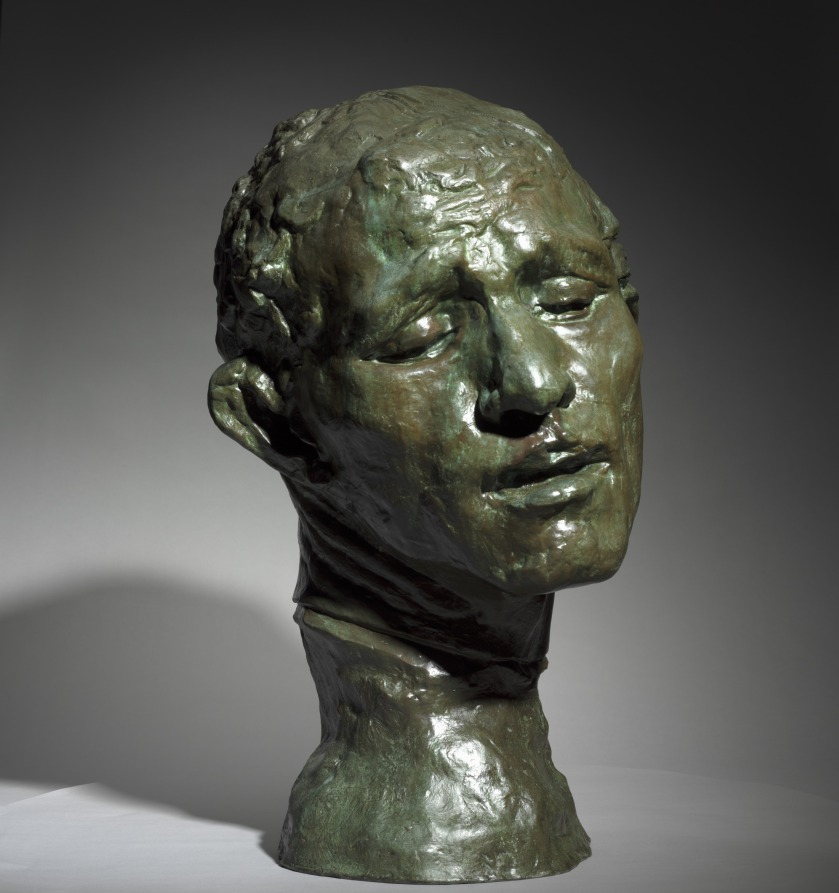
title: Heroic Head of Pierre de Wissant, One of the Burghers of Calais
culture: France, 19th century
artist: Auguste Rodin (French, 1840–1917)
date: 1886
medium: bronze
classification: Sculpture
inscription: inscribed at neck, left: A.Rodin; inscribed lower back: Alexis Rudier/Fondeur-Paris.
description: This sculpture depicts one of the figures in Rodin’s large public monument The Burghers of Calais (1884–89), featuring six French men who volunteered to be taken prisoner by the English in exchange for lifting the siege of Calais during the Hundred Years War (1337–1453). Pierre de Wissant’s anguished expression suggests extreme mental suffering as he contemplates his expected execution. Rodin exhibited a life-size version of the figure as an independent work before completing the monument. He later made multiple versions in various sizes and media.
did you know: This sculpture depicts the head of a figure from Rodin's large public monument The Burghers of Calais (1884-89). The CMA also owns a plaster version of the head.